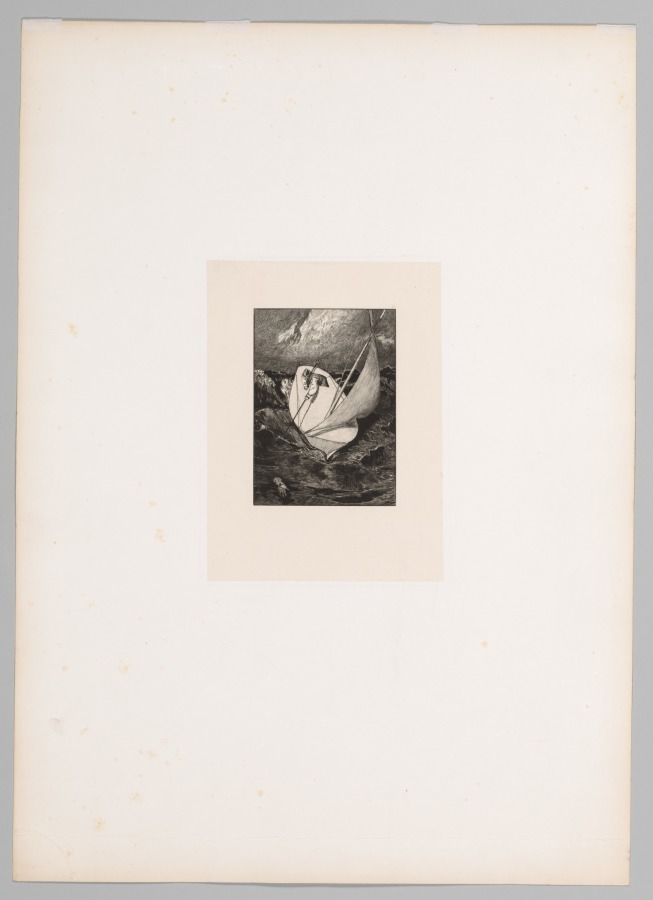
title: A Glove: The Rescue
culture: Germany, 19th century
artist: Max Klinger (German, 1857–1920)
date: 1880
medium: etching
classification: Print